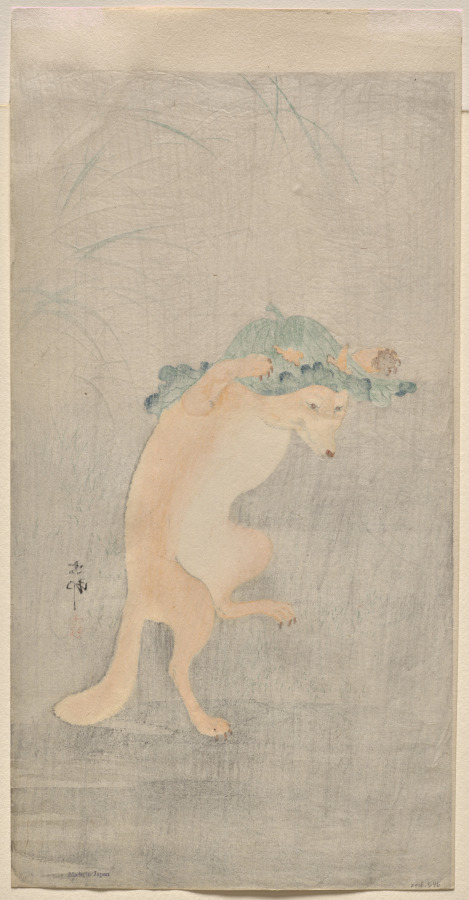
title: Dancing Fox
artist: Ohara Koson (Japanese, 1877–1945)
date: 1900–1910s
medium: Color woodcut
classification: Print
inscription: Signed and sealed by the artist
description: In this whimsical Japanese color woodcut, a fox holds a giant green leaf on its head and dances on its hind legs in the rain. A prolific printmaker, Ohara Koson created hundreds of kachōga, a genre encompassing images of nature. Translating characteristics of traditional Japanese painting into color woodcuts, Koson depicted flowers, insects, fish, birds, and mammals. Dancing Fox is one of a few in which he imagined a lighthearted scenario.